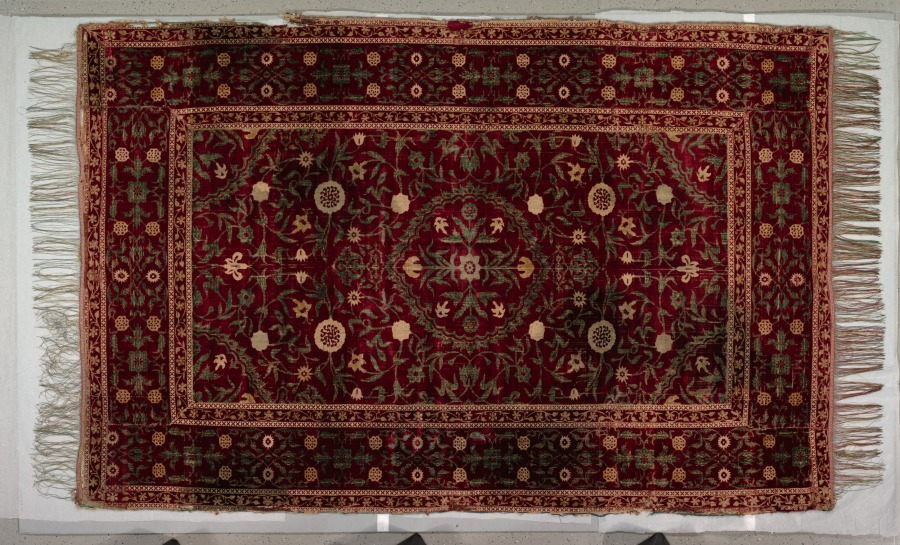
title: Floorspread with medallion pattern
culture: India, Gujarat, probably Ahmedabad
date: 1650–1700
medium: velvet, solid pile and pile-warp substitution: silk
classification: Velvet